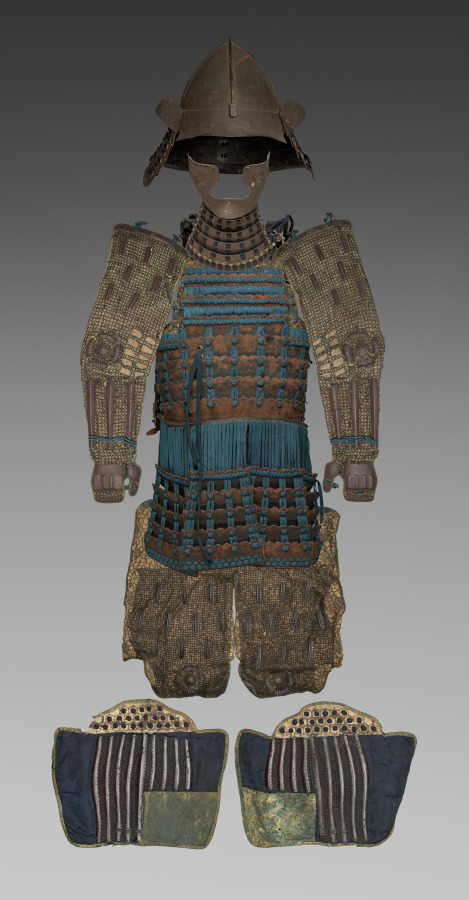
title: Suit of Armor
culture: Japan, Edo period (1615–1868)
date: 1615–1868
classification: Arms and Armor